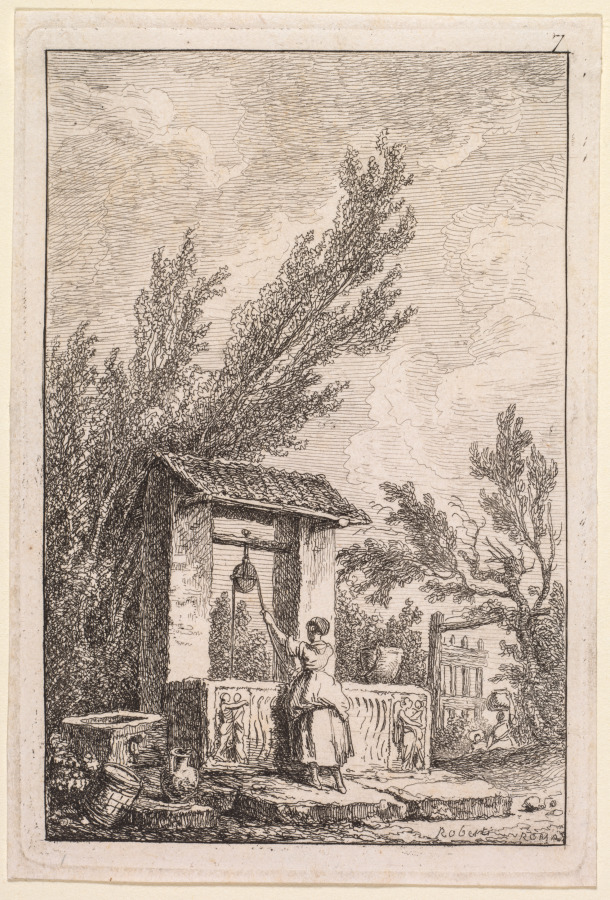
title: Le Puits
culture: France, 18th century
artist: Hubert Robert (French, 1733–1808)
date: 1763–64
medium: etching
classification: Print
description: Derived from his own pen-and-ink drawings, this suite of etchings features fictional characters situated near recognizable buildings and statues in Rome. On the title page, Robert dedicated the suite to Marguerite Le Compte, who visited Rome in 1764 in the company of the wealthy author and art enthusiast Claude Henri Watelet. Both Le Compte and Watelet were amateur etchers, and they socialized with a group that included artists and printmakers centered at the academies in Italy. Robert’s dedication was likely motivated by the hope of future patronage from Le Compte. She may be the generous woman with a hand muff depicted in The Ancient Temple, the fifth scene in this series.